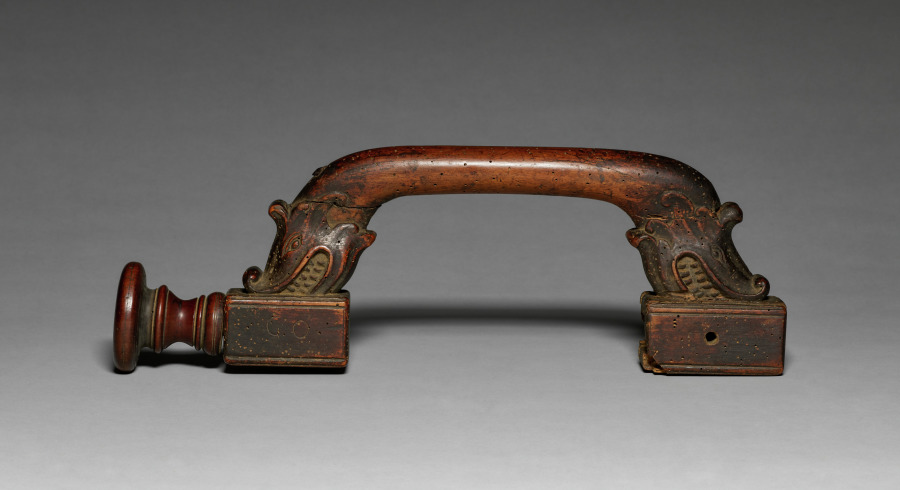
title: Brace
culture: Europe, 17th century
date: 1600s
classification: Tool